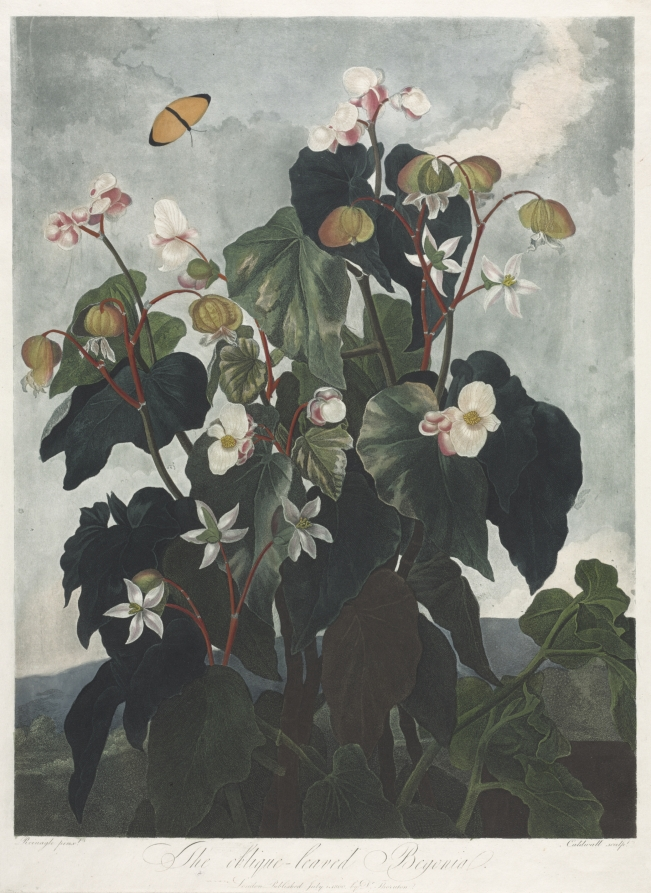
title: The Temple of Flora, or Garden of Nature: The Obique-leaved Begonia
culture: England, late 18th-early 19th Century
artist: James Caldwall (British, 1739–after 1789)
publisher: Robert John Thornton (British, 1768–1837)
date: 1800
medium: aquatint, stipple and line engraving, printed in colors and finished by hand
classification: Print